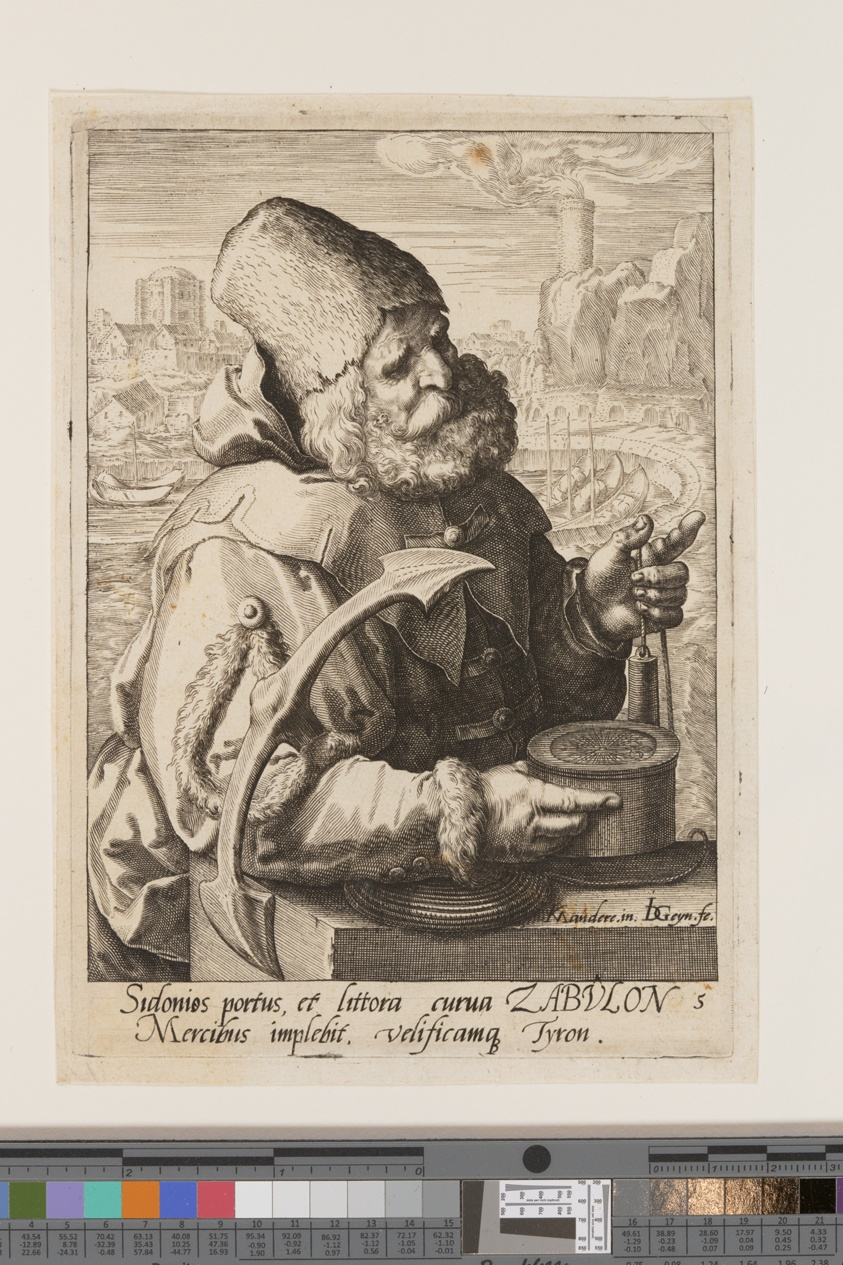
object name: Print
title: Zebulon, from The Twelve Sons of Jacob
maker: Jacques de Gheyn II (Dutch, 1565–1629); after Karel van Mander (Dutch, 1548–1606)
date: c. 1589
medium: Engraving on ivory laid paper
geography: Netherlands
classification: engraving; paper; print; prints and drawing